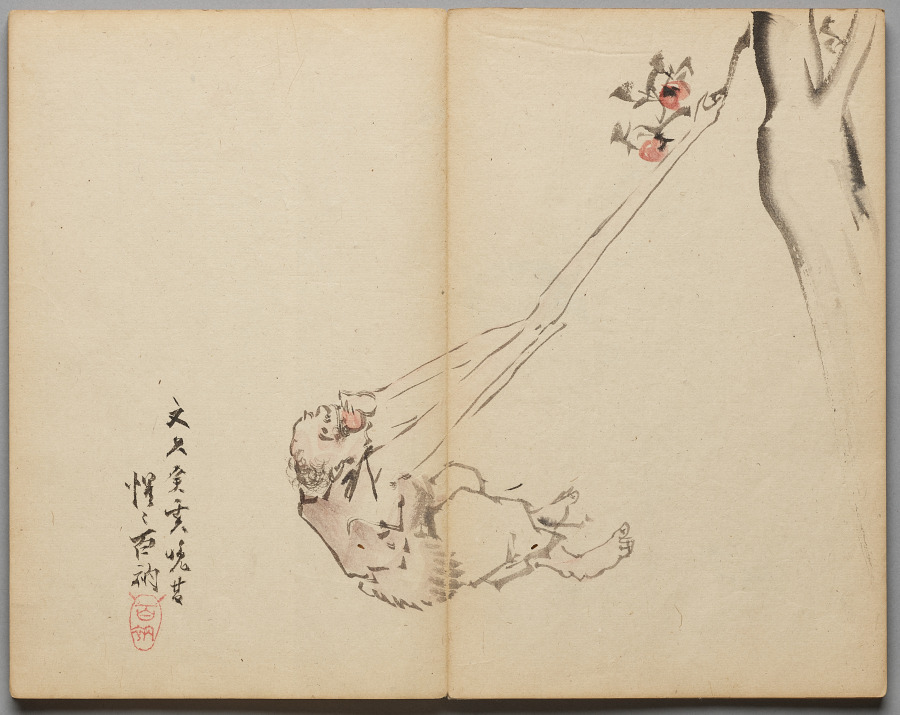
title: Long-arms Snatching Fruit from Sketch Book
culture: Japan, Edo period (1615–1868) to Meiji period (1868–1912)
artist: Kawanabe Kyōsai (Japanese, 1831–1889)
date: mid- to late 1800s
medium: Accordion-style book of 26 double-leaves; ink and color on paper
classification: Bound Volume